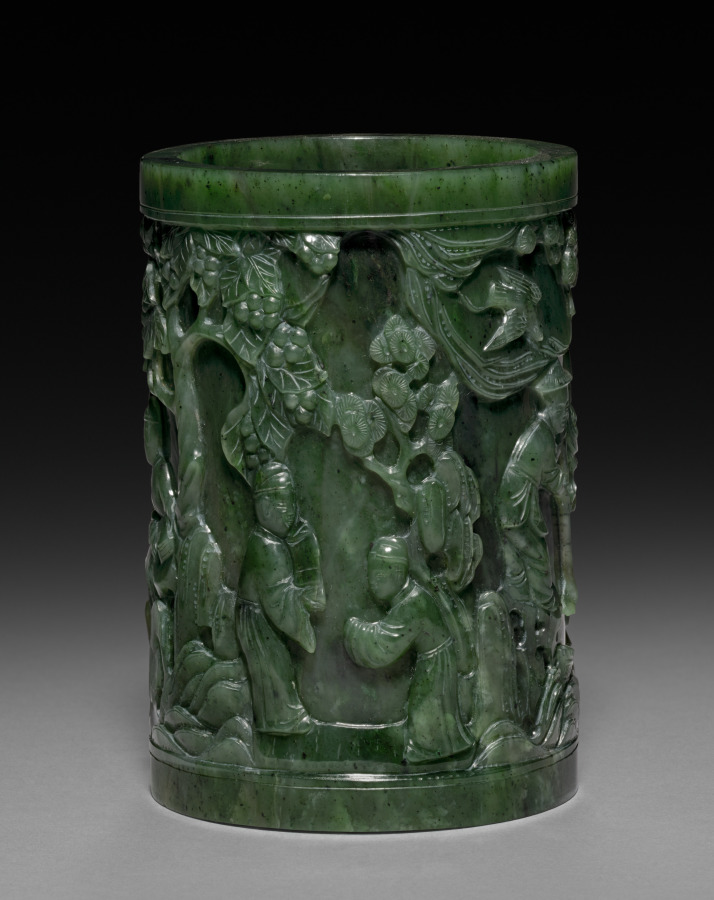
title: Brush Holder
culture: China, Qing dynasty (1644-1911)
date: 1800s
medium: spinach jade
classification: Jade